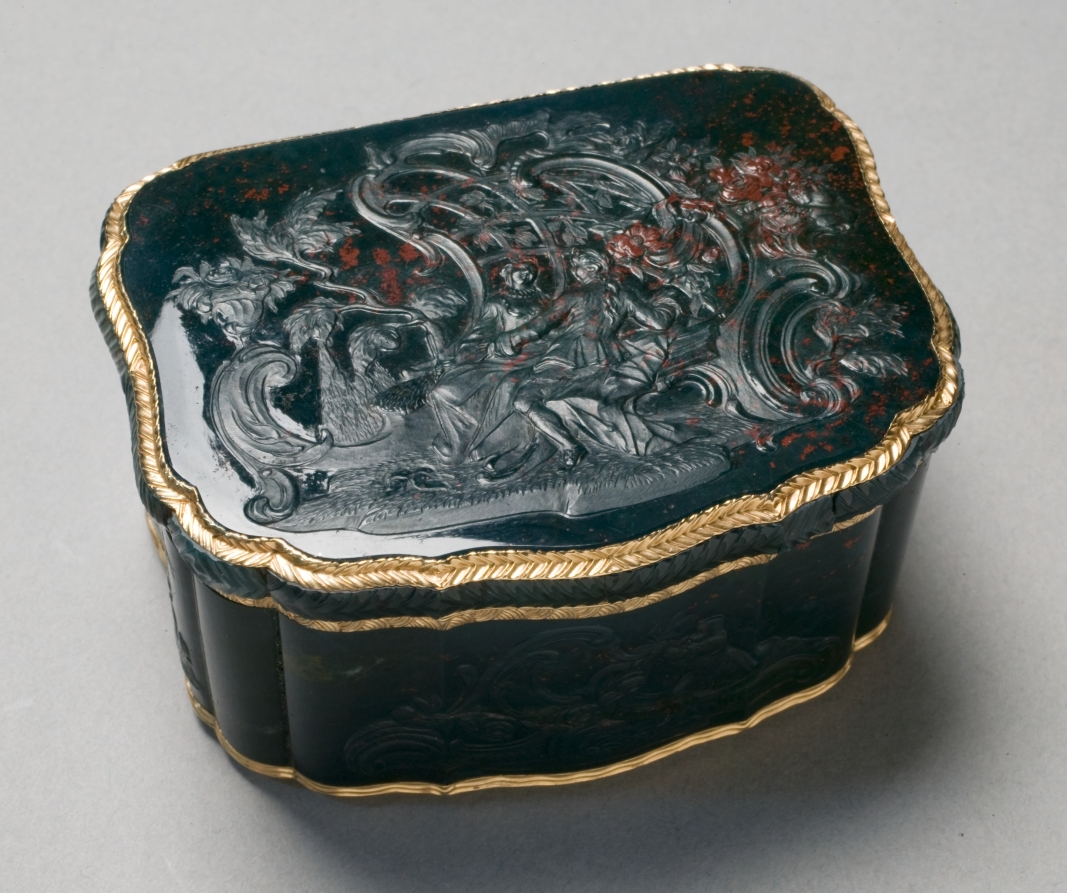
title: Snuff Box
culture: Germany, Berlin, mid-18th century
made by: attributed to Johannes George Klette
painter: Carl Gustav Klingstedt (Swedish, 1657–1734)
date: c. 1750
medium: gold-mounted carved bloodstone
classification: Miscellaneous